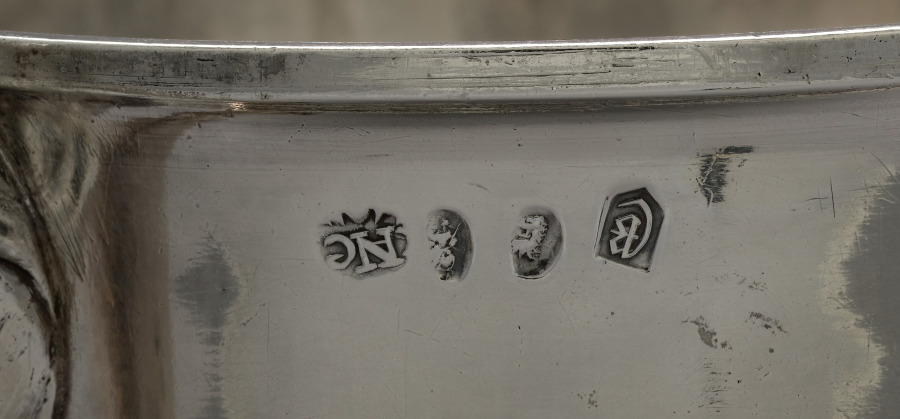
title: Two-Handled Cup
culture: England, London, 18th century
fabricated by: Anthony Nelme (British)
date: 1712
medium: silver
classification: Silver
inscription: engraved: coat of arms of Irvine of Bonshaw imaling O'Bryen.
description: Nelme was one of the most famous and successful native English silversmiths of a time when Huguenots (French Protestants) dominated the creation of richly decorated pieces for the most fashionable market.